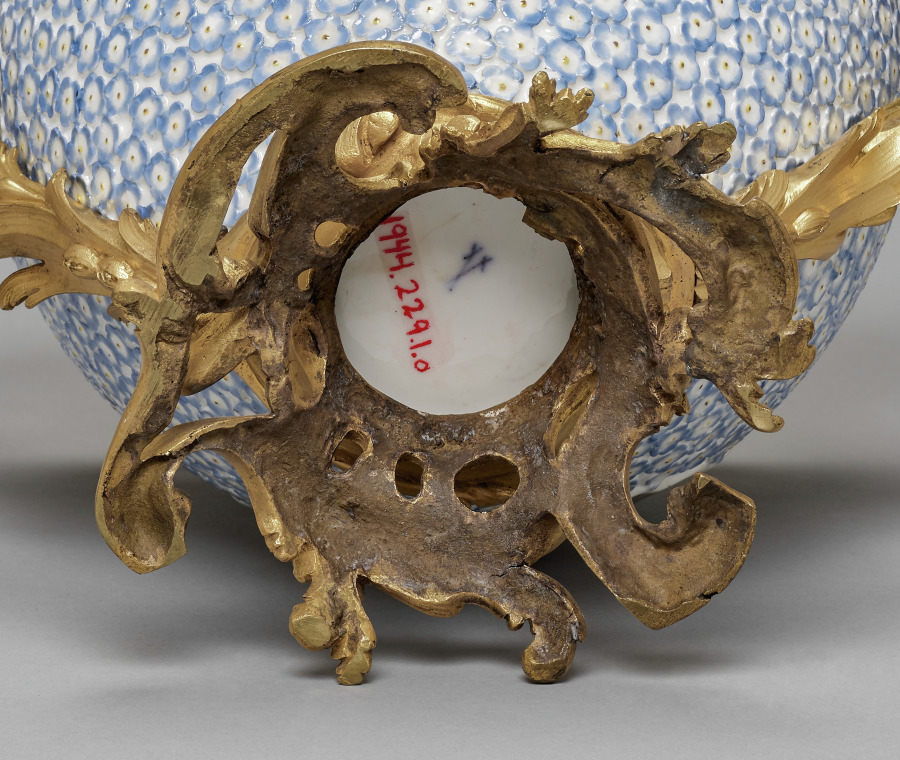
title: Vase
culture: Germany, 18th century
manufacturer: Meissen Porcelain Factory (German, est. c. 1710)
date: 1749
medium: porcelain mounted in gilt bronze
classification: Ceramic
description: One of these vases is dated 1749. They were perhaps part of a set of four covered vases that we know from documents were acquired by Mme. de Pompadour, mistress of Louis XV in 1752.